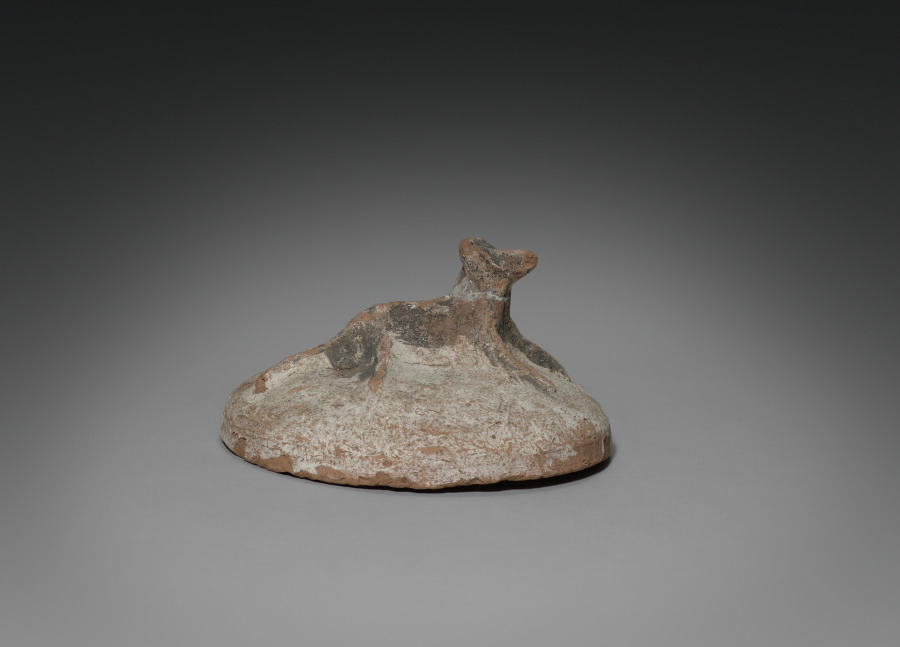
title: Shawabty Jar with Lid (lid)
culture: Egypt, New Kingdom (1540–1069 BCE), Dynasties 19–20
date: 1295–1069 BCE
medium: Nile silt ware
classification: Funerary Equipment